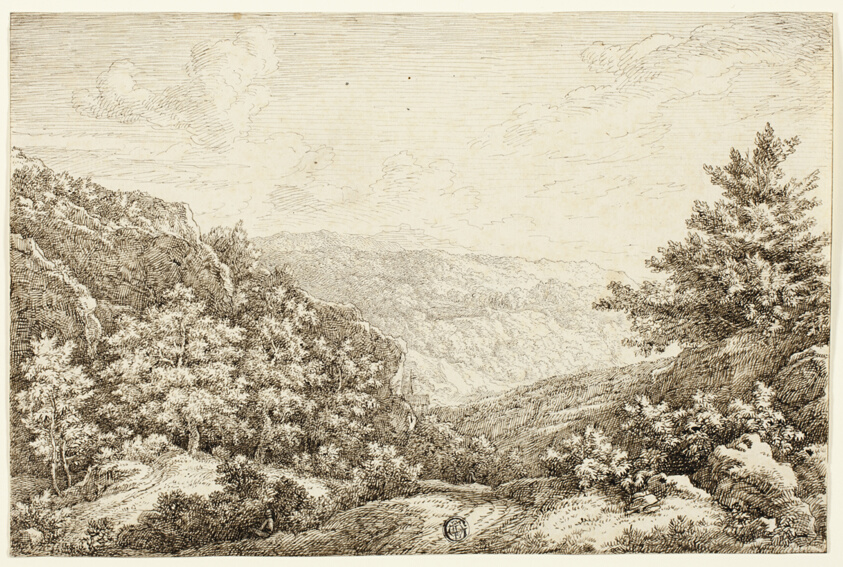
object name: Drawing and Watercolor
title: Landscape with Wooded Hills, Seated Figure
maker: Nicolaes Emmanuel Perij (Flemish, born 1736)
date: 1756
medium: Pen and brown ink on ivory laid paper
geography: Flanders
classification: pen and ink drawings; drawings (visual works); prints and drawing